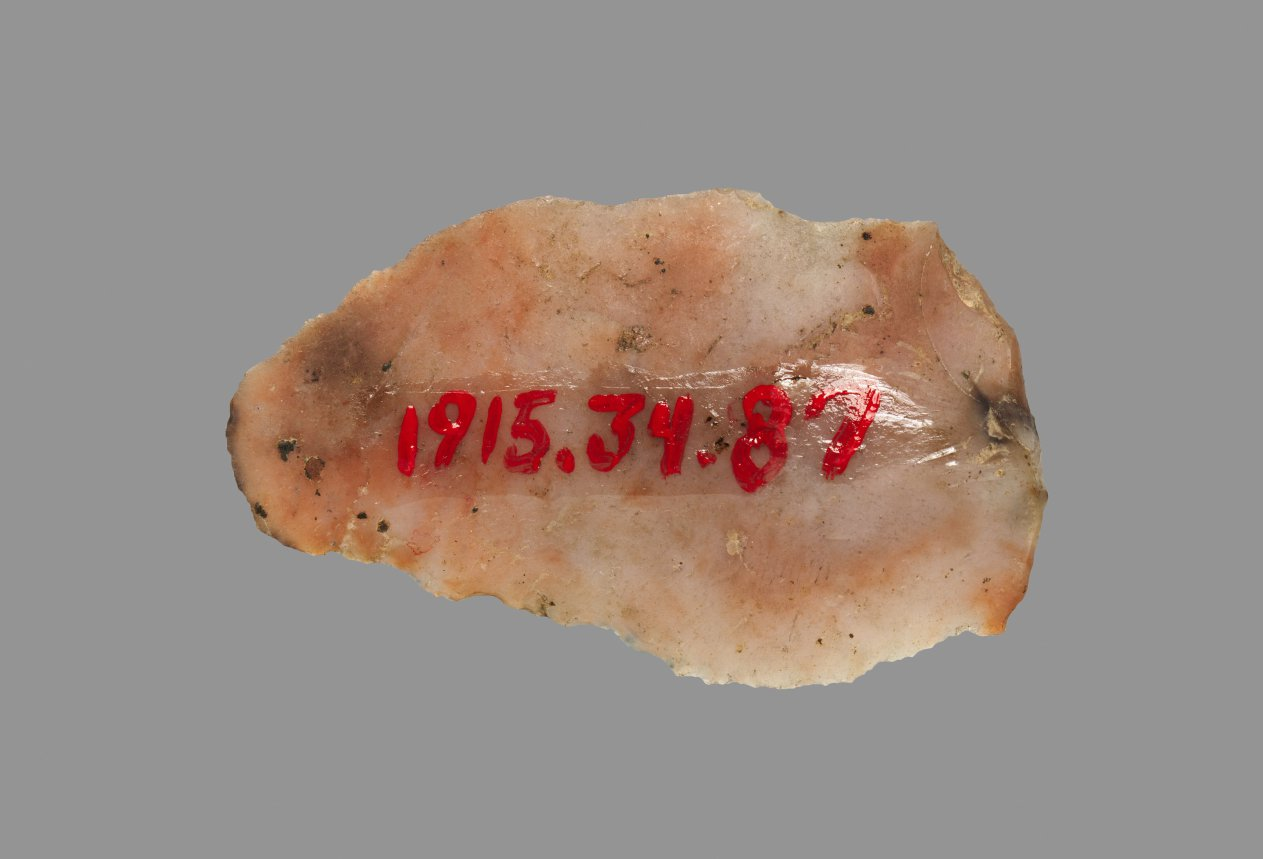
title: Sickle Blade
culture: Egypt, Middle Kingdom (2040–1648 BCE), Dynasty 12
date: 1980–1801 BCE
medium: flint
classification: Implements